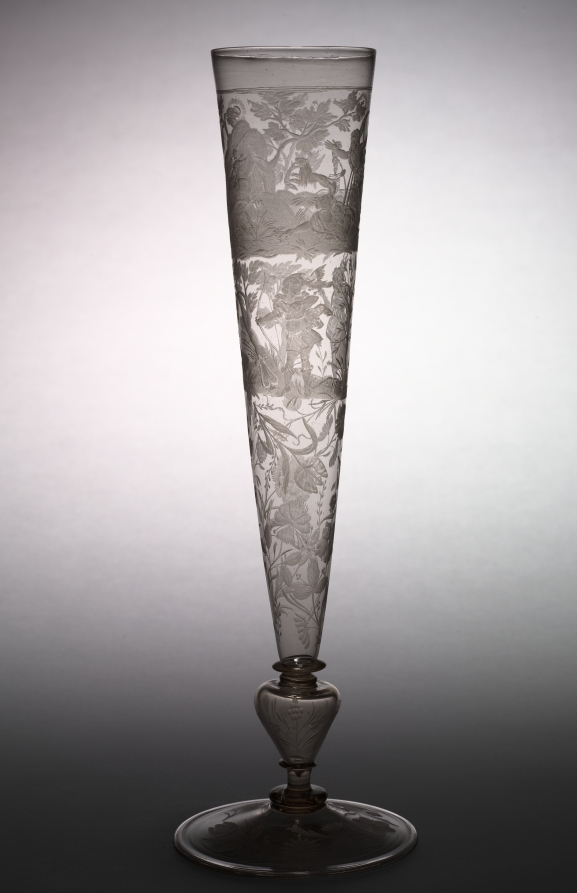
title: Flute Glass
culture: Germany, Thuringia, early 17th century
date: early 1600s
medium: glass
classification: Glass